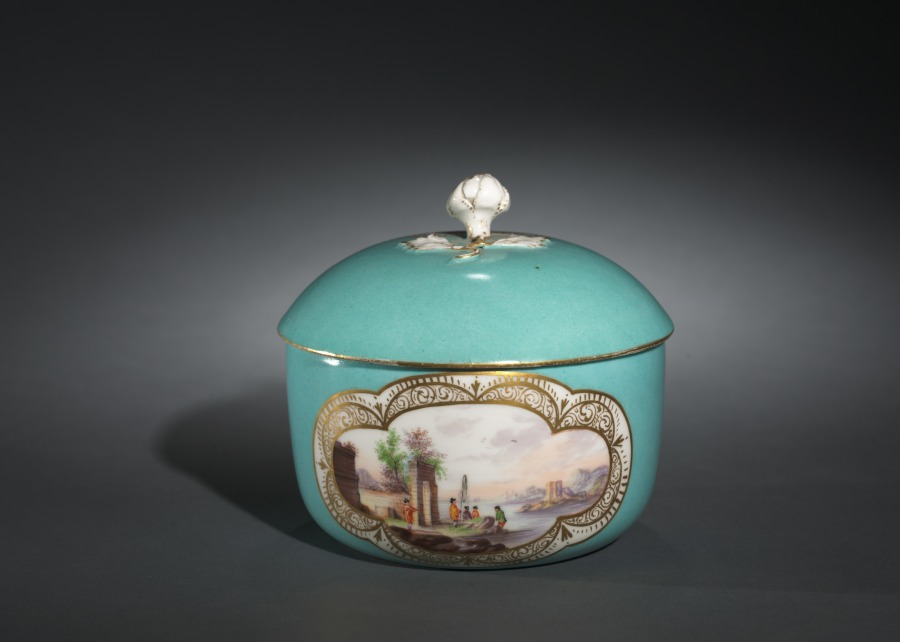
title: Sugar Bowl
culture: Germany, Meissen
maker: Meissen Porcelain Factory (German, est. c. 1710)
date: c. 1750–70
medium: porcelain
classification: Ceramic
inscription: Half moon mark on the bottom.